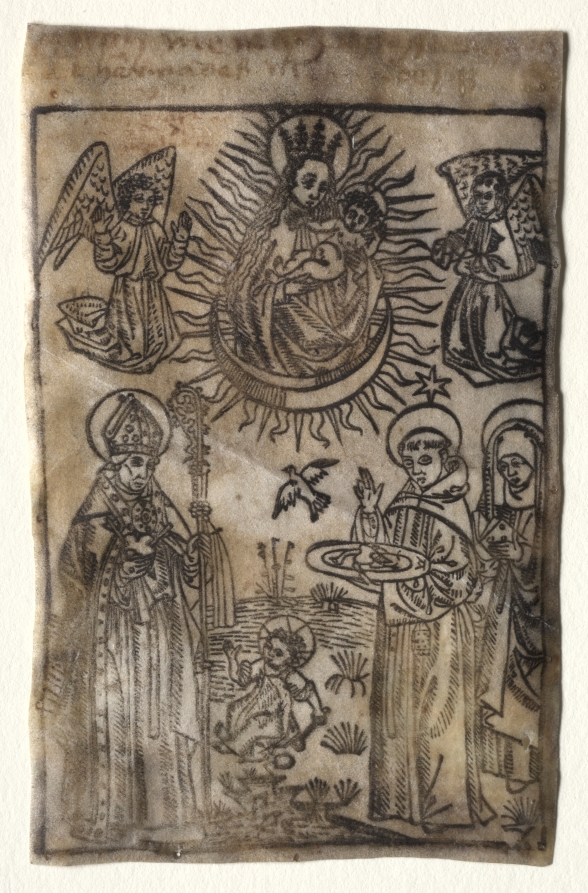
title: Madonna and Child with Three Members of the St. Augustine Order: Saints Augustine, Nicholas and Clara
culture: Germany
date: 1400s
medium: woodcut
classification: Print